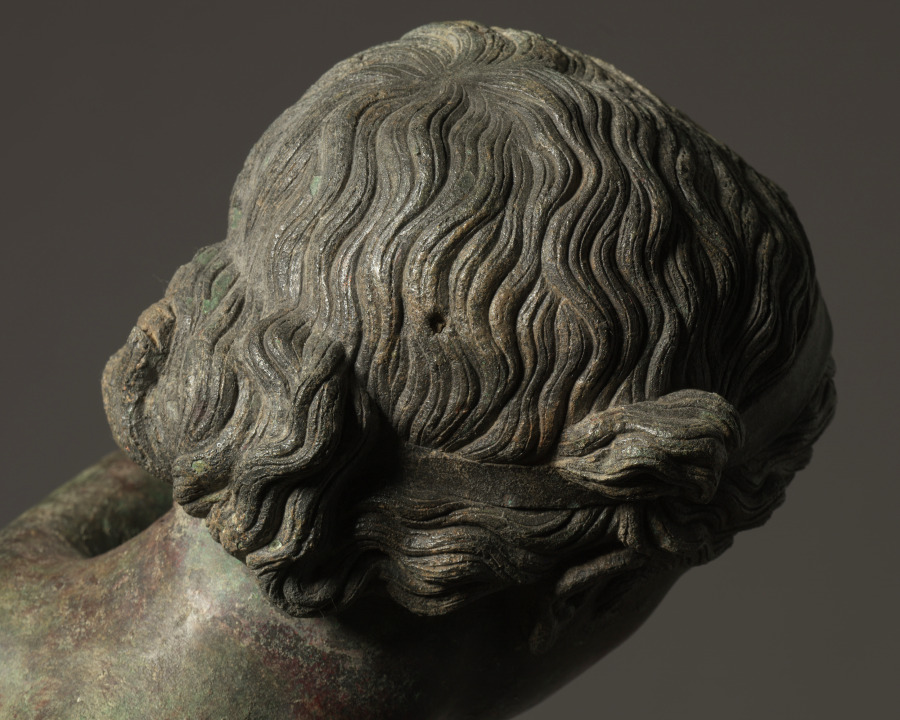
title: The Cleveland Apollo: Apollo Sauroktonos (Lizard-Slayer) or Apollo the Python-Slayer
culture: Greece, Athens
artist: attributed to Praxiteles (Greek, Athenian, c. 400–330 BCE)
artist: or Follower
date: c. 350–200 BCE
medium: bronze, copper and stone inlay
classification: Sculpture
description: The Cleveland Apollo was cast in multiple sections using the indirect lost-wax technique. First, molds were taken from a working model (now no longer known or preserved), which was then reproduced in hollow wax sections, each filled with a clay core. After details were added to the wax models, each was encased in clay. Then, the wax was heated, melted out, and replaced by molten bronze. Once cooled, the hollow bronze sections were fused together and finished, patching flaws and adding inlays and other details. Since the initial model was retained, it could be reused, allowing ancient sculptors to create multiples and variations of favorite works. Thus, remarkably, the Cleveland Apollo may once have been one of several such works. The consistently thin walls of the Cleveland Apollo (mostly 5-6 mm thick), together with the nearly invisible joins between most cast sections, show that it was created by highly skilled sculptors and foundry workers. Close looking reveals several noteworthy features. First, ovals atop the right foot mark a fusion weld, where molten bronze pooled to join separately cast sections. Second, small rectangular bronze patches cover parts of the surface (especially the right hip), each carefully cut and then hammered into place over holes or other casting defects. Inlaid lips, nipples, and eyes (the right ancient stone, the left now a modern replacement) added to the lifelike appearance of the sculpture, contrasting with the once bronze-colored skin. Finally, radiography helps to illuminate hidden features, such as the cast edge of the neck of Apollo.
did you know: Ovals across the top of the right foot show a clear join between separately cast sections.